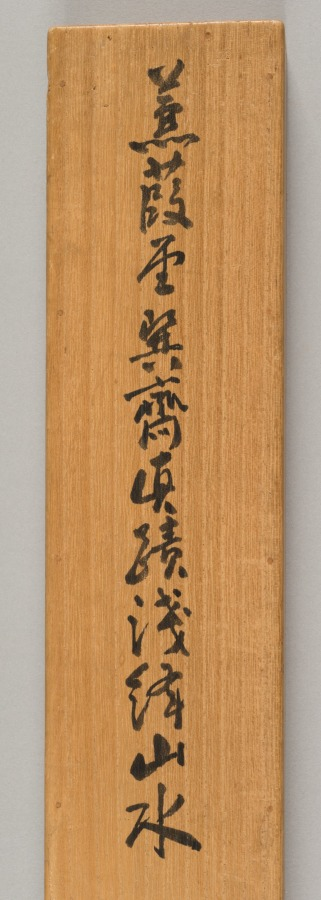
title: Landscape with Boaters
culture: Japan, Edo period (1615–1868)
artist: Kimura Kenkadō (Japanese, 1736–1802)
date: late 1700s–early 1800s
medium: hanging scroll; ink and slight color on paper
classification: Painting